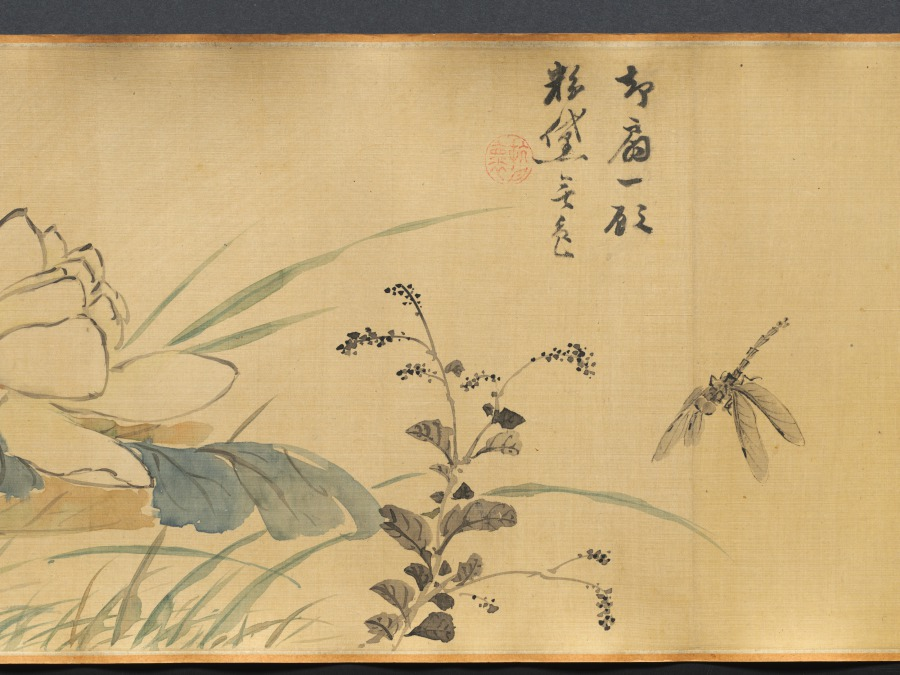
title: Flowers of Four Seasons, with Poems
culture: China, Ming dynasty (1368–1644)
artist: Wang Guxiang (Chinese, 1501–1568)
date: 1531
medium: handscroll; ink and light color on silk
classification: Painting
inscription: Artist's inscription, signature, and 15 seals. Ink Orchids. Sewn as pendants for the man of worth, swaying quiety, fragrance in the valley. [seal] Hsiao-chu ts'un Peony. Wiping his face, the young gentleman Ho [Ho Yen of Wei, Three Kingdoms] appears to have been powdered. His previous life was the perfume-stealing Han Shou [of Chin, 265–419 CE], the fragrance still lingers. [seal] Ts'un-wu chai. Flowering Crab Apple, New Bamboo. Shao-lin [Du Fu, 712–770] had to put down his brush. [Flowering Crab Apple]. Yü-k'o [Wen T'ung, d. 1079) in vain wrote poems about [Bamboo]. [seal] Yu-shih. Lotus Flowers. When she turns her head, half-hidden by a fan, and casts a glance, all the beautiful women become colorless. [seal] K'ang yüeh huai. Loquat. Ripeness in summer. [seal] Lu-chih. Pomegranate Flower. Whenever I remember you I will send my thoughts, but where have you gone--the [skirt] of pomegranate red? [seal] Wu-ho Sheng. Day Lily. Plant the day lily to forget sorrow. [seal] Yu-shih. Chrysanthemum. The untrammelled joy at the eastern fence. [seal] Lu-chih. Begonia. Comparing it to the beauties of Spring, and spreading them out as trimming for the stone steps. [seal] Yu-shih. Hibiscus. In recent years I have always enjoyed looking at flowers; instead of dark red I preferred pink ones. [seal] Jen-sheng i-lou. Narcissus, Camellia. The jade girdle left behind at Lo River. [Narcissus]. The precious pearls glitter before Spring. [Camellia]. [seal] Lu-chih. Heavenly Bamboo (Nandina domestica). A single branch in the wintry season. [seal] K'ang yüeh huai. Plum. Fragrant snow in the Lo-fou Mountains. [seal] Ts'un-wu chai. In the eleventh lunar month of the hsin-mao year of the Jiaqing era [1531], [I] imitated the boneless style of Yüan masters in sketching from life. Guxiang [seals] Yu-shih; Lu-chih. Translated by Wai-kam Ho/Lingyun Shih Liu (1980)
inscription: 2 colophons and 23 additional seals: 1 colophon dated 1632, and 2 seals of Li Jih-hua [Li Rihua] 李日華 (1565–1635); 1 colophon and 2 seals of Xiang Shengmo 項聖謨 (1597–1658); 3 seals of Liang Qingbiao 梁清標 (1620–1691); 6 seals of the Jiaqing 嘉慶 emperor (r. 1796–1820); 9 seals of Ch'eng Ch'i [Cheng Qi] 程琦 (1911–1988)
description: In this painting, flowers are loosely arranged by the seasons: narcissus and peony represent early spring; yellow loquat and lotus, summer; chrysanthemum, autumn; and the plum and evergreen bamboo, winter. The artist added to each flower a poetic line of calligraphy associating each plant with a historic or legendary figure. For example, the chrysanthemum, along with the line “The untrammeled joy at the eastern fence,” refers to the poet Tao Yuanming (died AD 427) who enjoyed chrysanthemums at the eastern fence in his garden. The scroll illustrates Wang Guxiang’s mastery of free brushwork, combining light monochrome ink with transparent colors. In his inscription, Wang says he used the “boneless” style without outlines as developed during the Yuan dynasty (1279–1368). Wang was a native of Changzhou, a city in southeast China known for its rich flora and fauna, and flower-and-bird painting tradition.